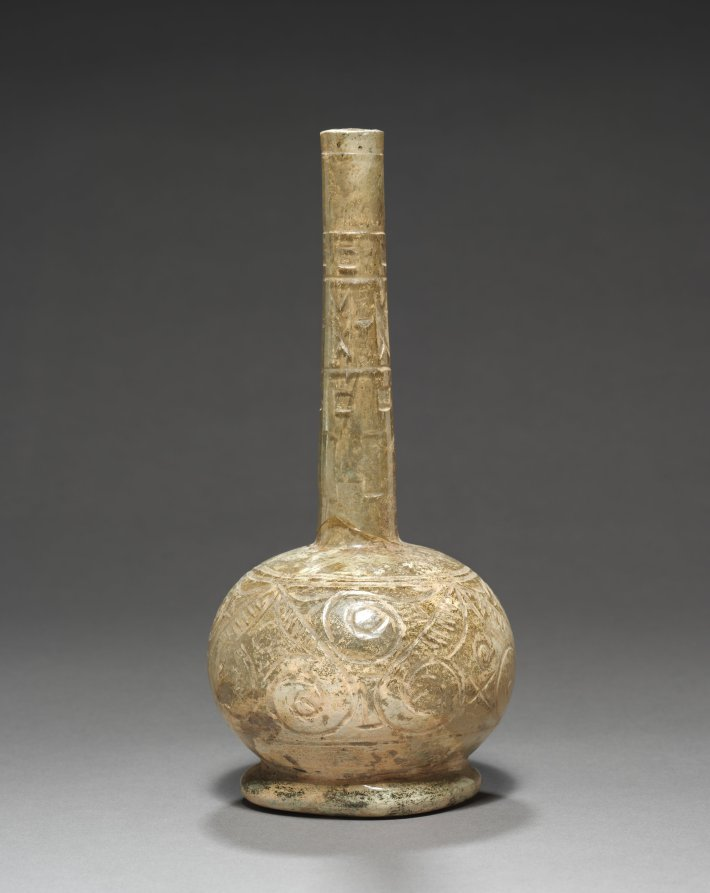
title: Bottle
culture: Iran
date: 800s–900s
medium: glass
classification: Glass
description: This glass bottle has a wide decorative band of geometric and spiral motifs carved onto its body and neck.